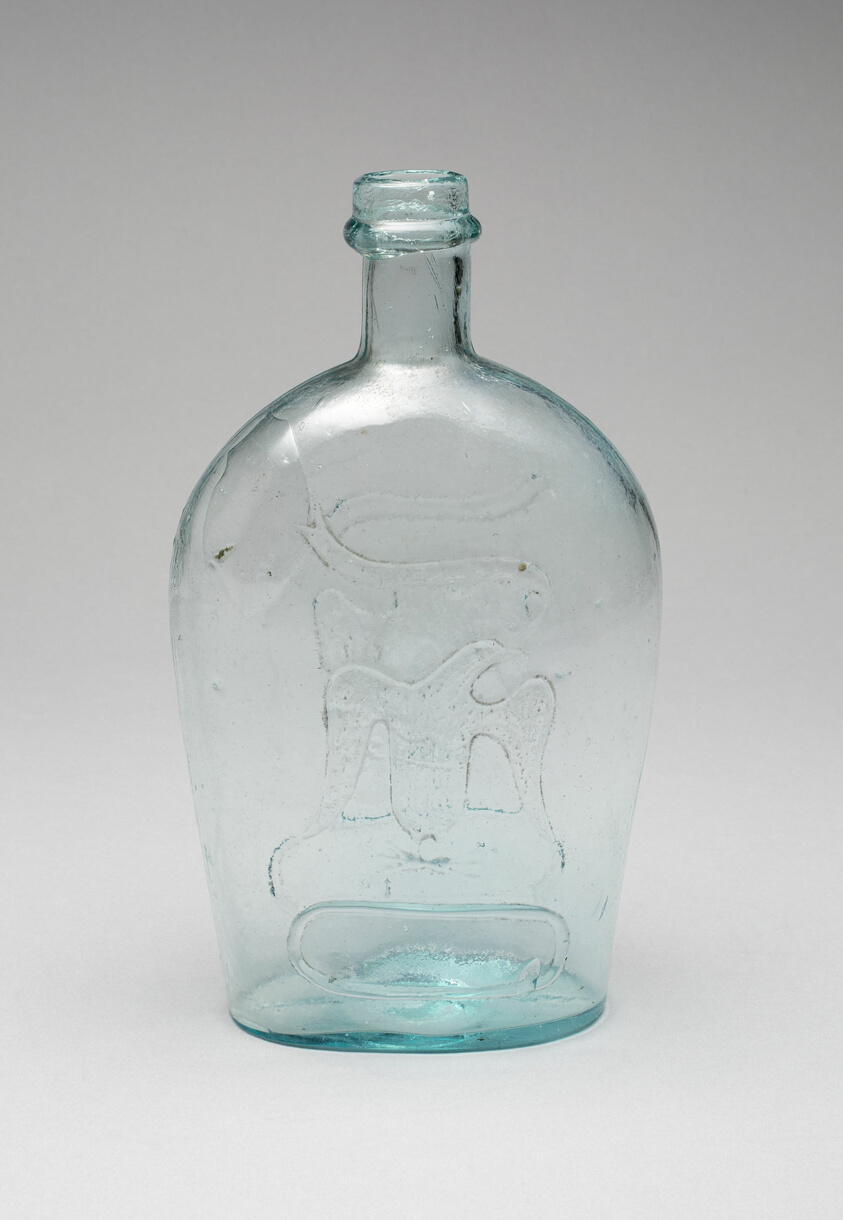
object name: Glass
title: Flask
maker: Artist unknown (American, 19th century); Probably Pittsburgh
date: 1860–75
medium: Glass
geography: United States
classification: flask (bottle); glass; american decorative arts; american arts; decorative arts